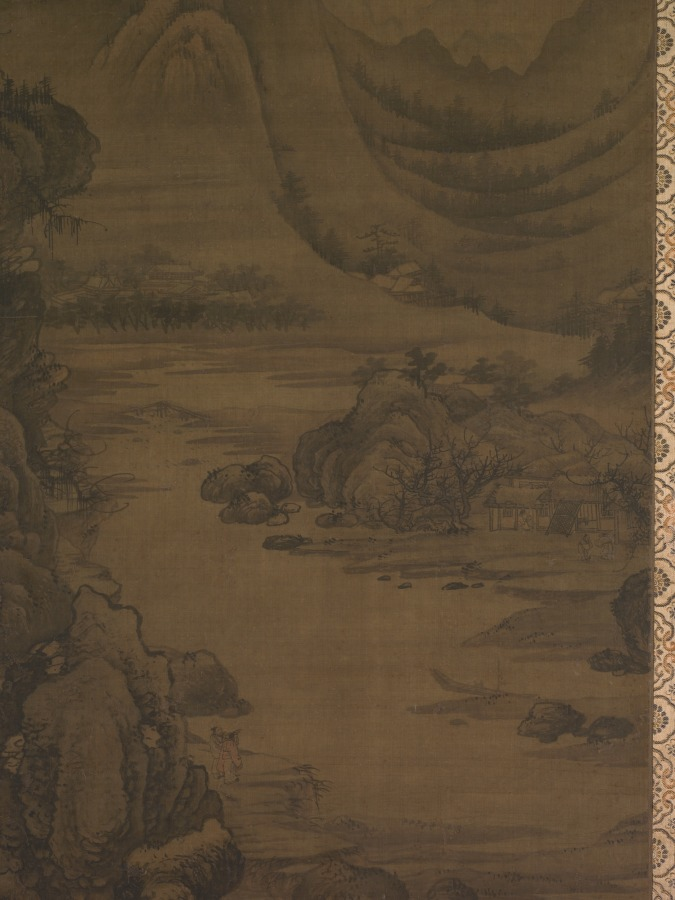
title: Landscape in the Style of Juran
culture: China, Ming dynasty (1368–1644)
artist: attributed to Liu Du (Chinese, active c. 1628-after 1653)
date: 1368–1644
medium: Hanging scroll mounted as a panel; ink and slight color on silk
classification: Painting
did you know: There is a tiny apocryphal signature under the overhanging rocks on the lower left side.